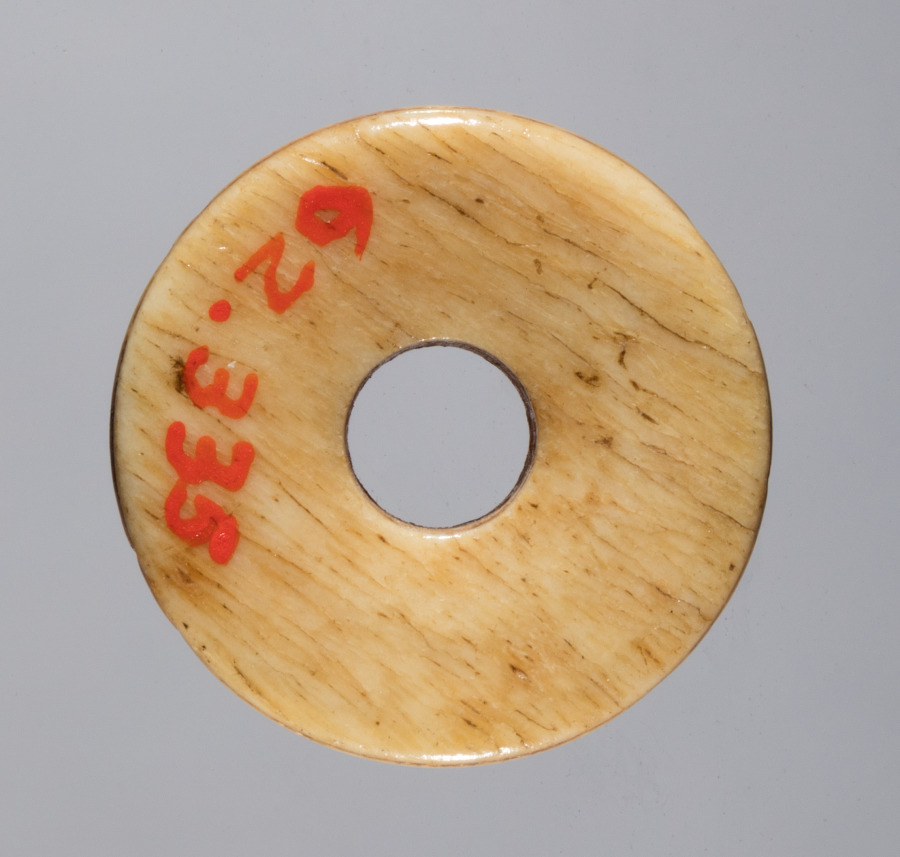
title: Spindle Whorl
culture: Iran, early Islamic period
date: 700s - 900s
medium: bone, incised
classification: Spindle Whorl